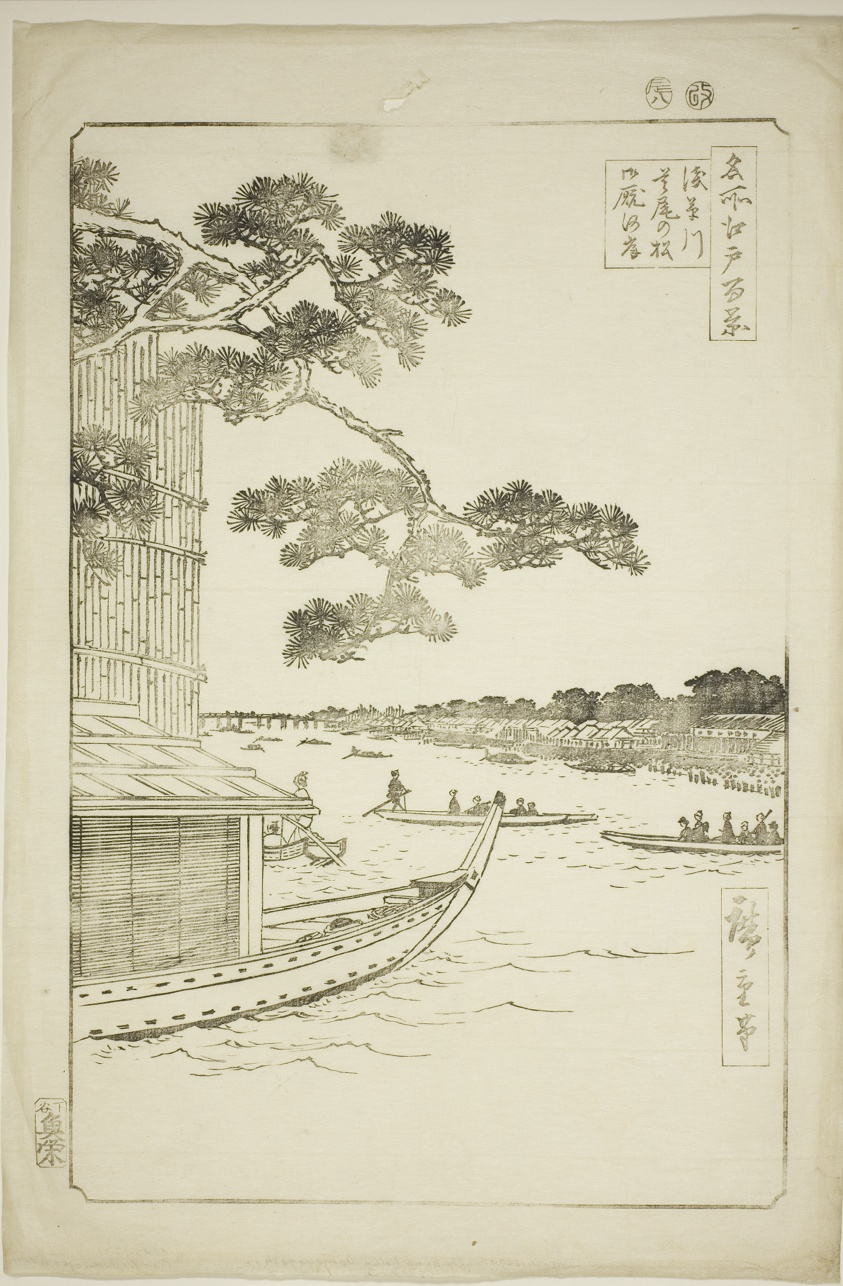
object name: Print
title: Pine of Success and Oumayagashi, Asakusa River (Asakusagawa shubi no matsu Oumayagashi), from the series "One Hundred Famous Views of Edo (Meisho Edo hyakkei)"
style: Japanese (culture or style)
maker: Utagawa Hiroshige 歌川 広重; Japanese, 1797-1858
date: 1856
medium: Woodblock print; oban, keyblock proof impression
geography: Japan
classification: woodblock print; print; asian art; woodblock